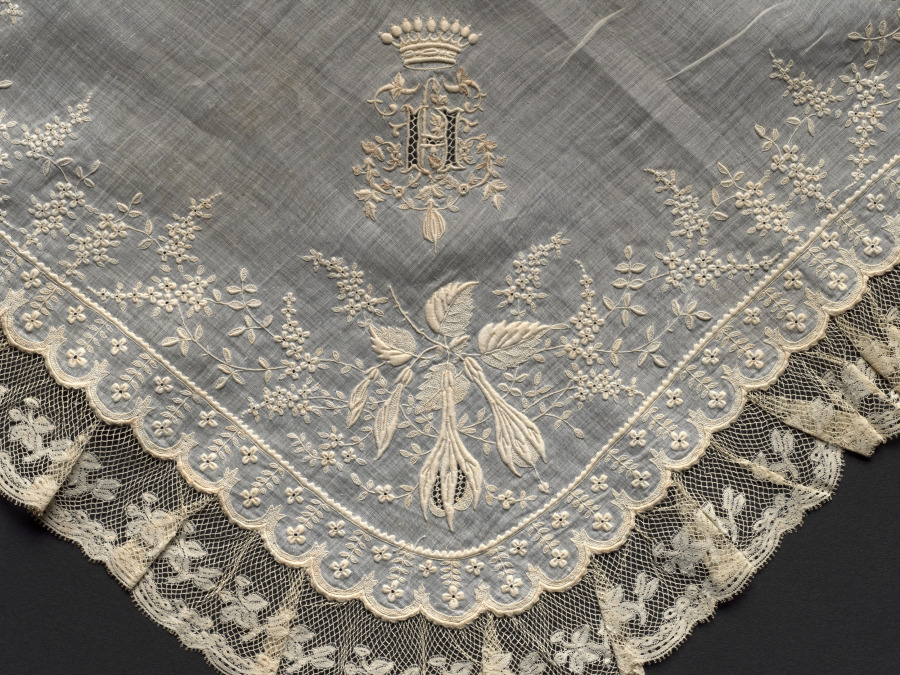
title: Lace Handkerchief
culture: France or Flanders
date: 1800s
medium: Plain weave linen center with bobbin lace (Valenciennes lace) edging and embroidery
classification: Embroidery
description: The initial H is embroidered in one corner of this handkerchief, along with a nine-point coronet around it.